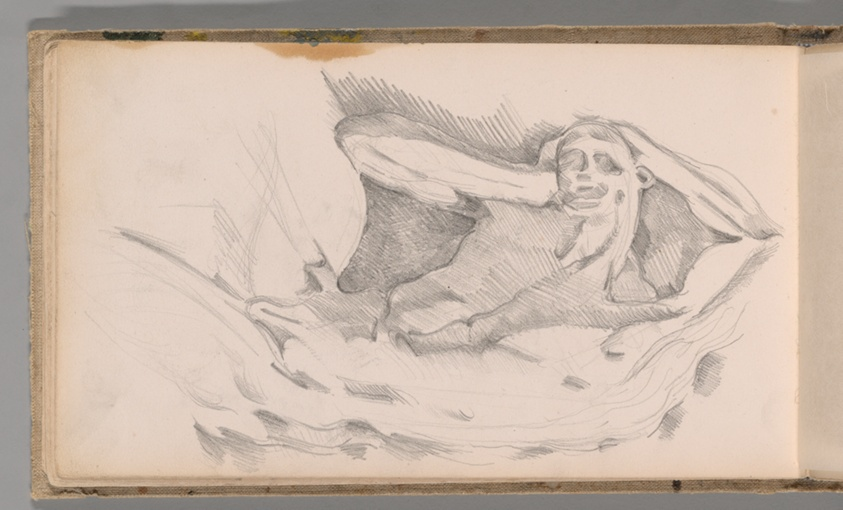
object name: Drawing and Watercolor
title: Sketchbook No. 2 (L'Estaque)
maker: Paul Cézanne; French, 1839-1906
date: 1875–86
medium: Graphite and pen and ink drawings on paper, bound into a book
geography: France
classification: sketchbook; graphite; prints and drawing; paper